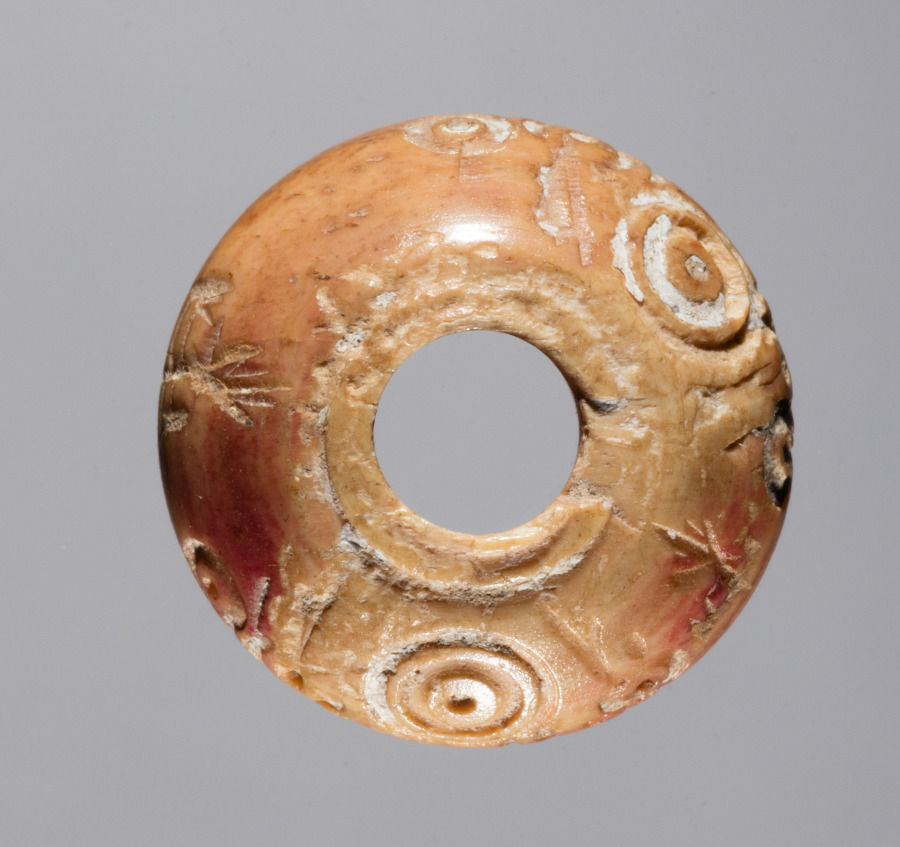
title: Spindle Whorl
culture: Iran, early Islamic period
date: 700s - 900s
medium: bone, incised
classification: Spindle Whorl